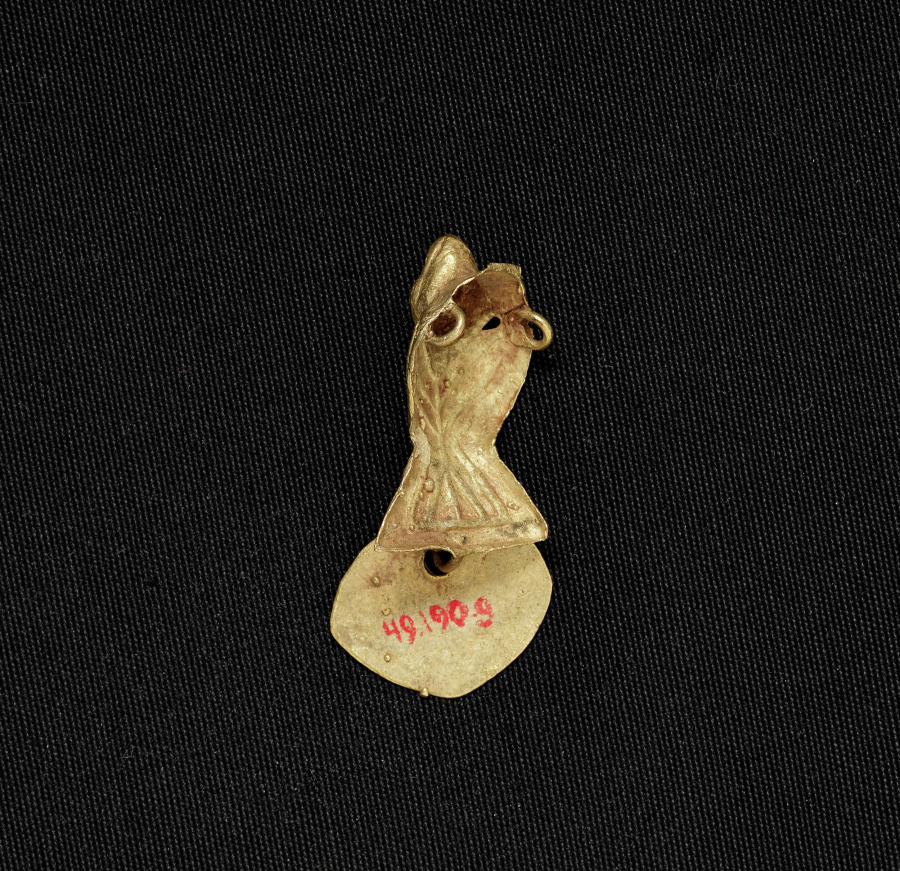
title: Bird Bead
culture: Colombia, Muisca style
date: c. 900–1550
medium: cast gold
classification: Jewelry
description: Muisca metalwork divides into two categories: ornaments to be worn, such as these, and offering figurines, in the case to the right. The elaborate bird pendant features delicate herringbone moldings, openwork patterns, and wing details-all part of the wax model from which the pendant was cast (see nearby computer animation). The dangles were attached after casting.